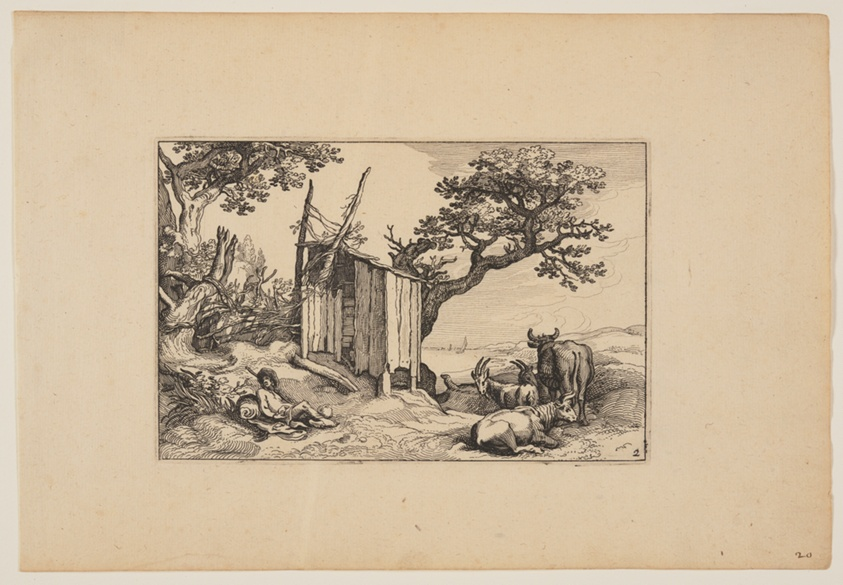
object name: Print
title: Dilapidated Barn with Herd and Cattle, from Landscapes (Verscheyden aerdige Lanthuysen...)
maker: Claes Jansz. Visscher (Netherlandish, c. 1550–c. 1612); after Abraham Bloemaert (Dutch, 1566–1651)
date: 1620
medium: Etching on ivory laid paper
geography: Netherlands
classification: print; paper; prints and drawing; etching